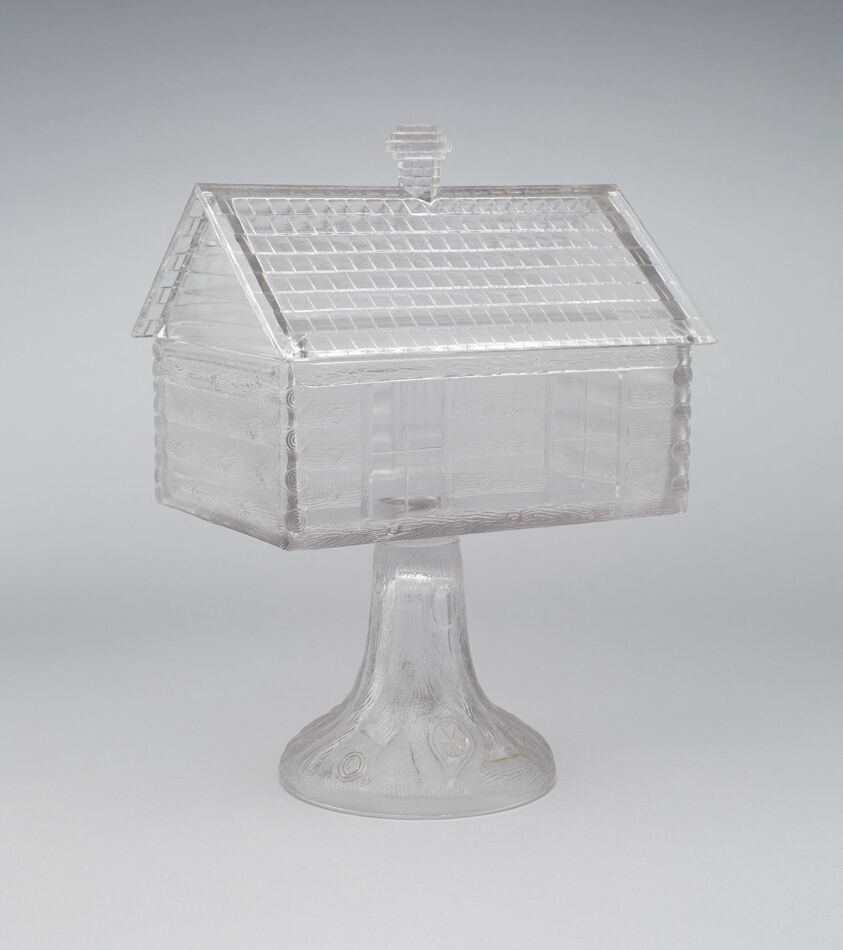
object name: Glass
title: "Log Cabin" pattern covered compote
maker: Central Glass Company; American, 1867–1896; Wheeling, West Virginia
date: c. 1875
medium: Pressed glass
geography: Wheeling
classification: compote; glass; vessel for serving food; american decorative arts; american arts; decorative arts